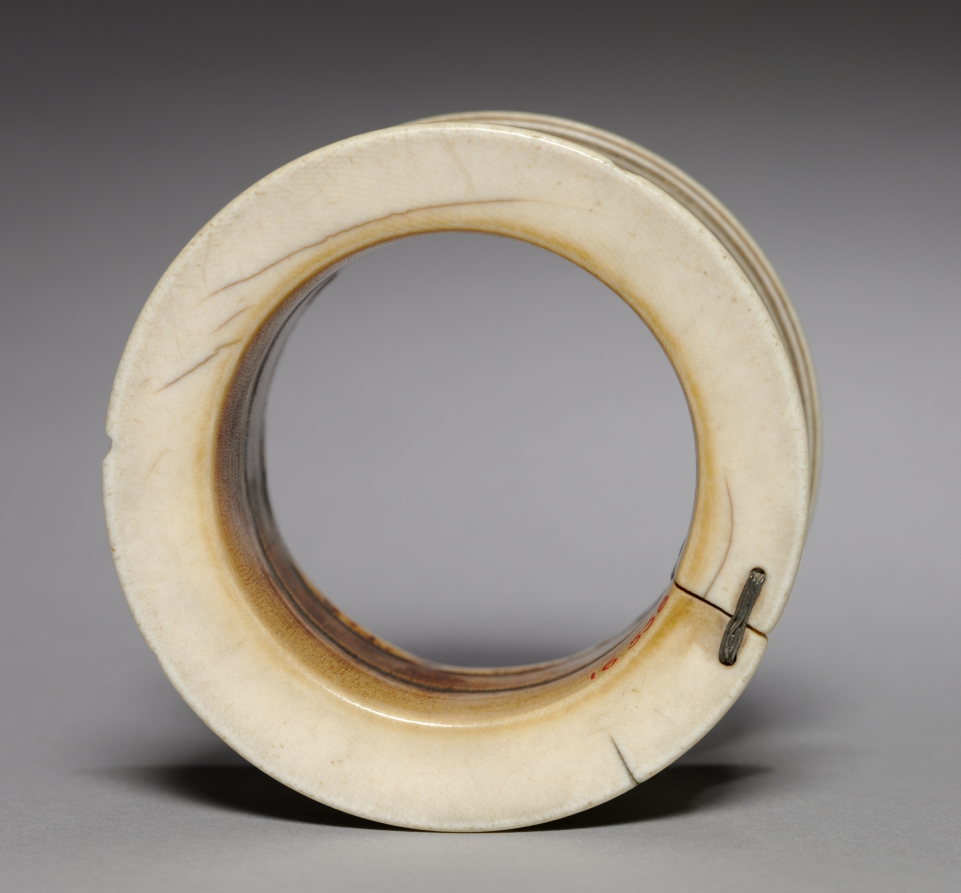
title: Bracelet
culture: Africa, Central Africa, Democratic Republic of the Congo, Kuba-style maker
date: c. 1900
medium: Ivory and wire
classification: Jewelry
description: This ivory bracelet is simple, yet elegant. Note how the delicate wire repair by a Kuba artisan adds a counterpoint pattern to the original design.